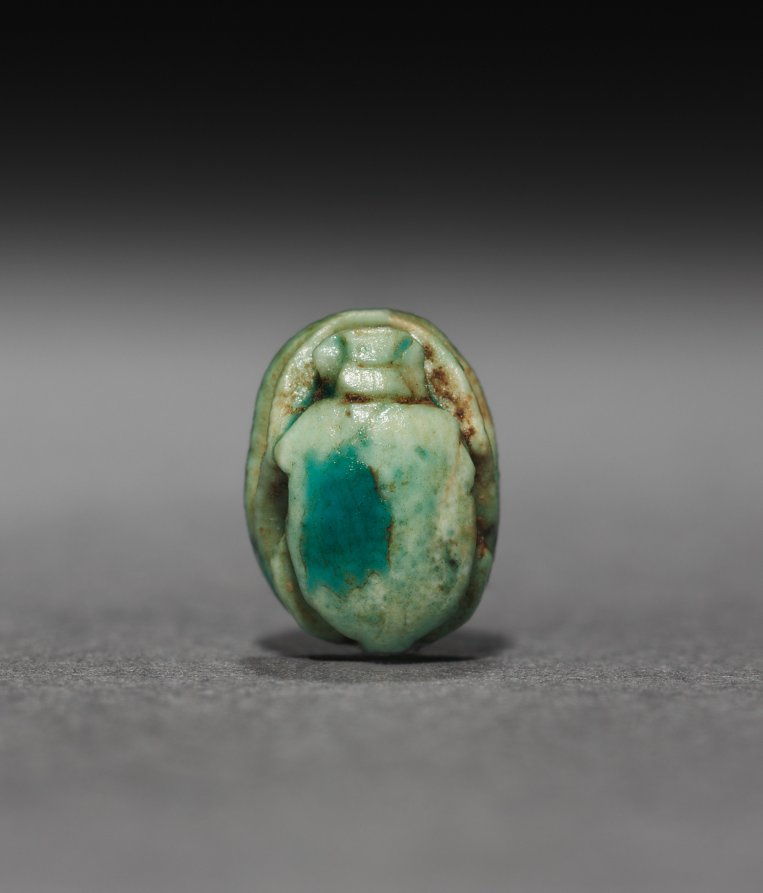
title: Scarab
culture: Egypt, New Kingdom or modern forgery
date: 1550–1077 BCE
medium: glazed steatite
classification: Scarabs